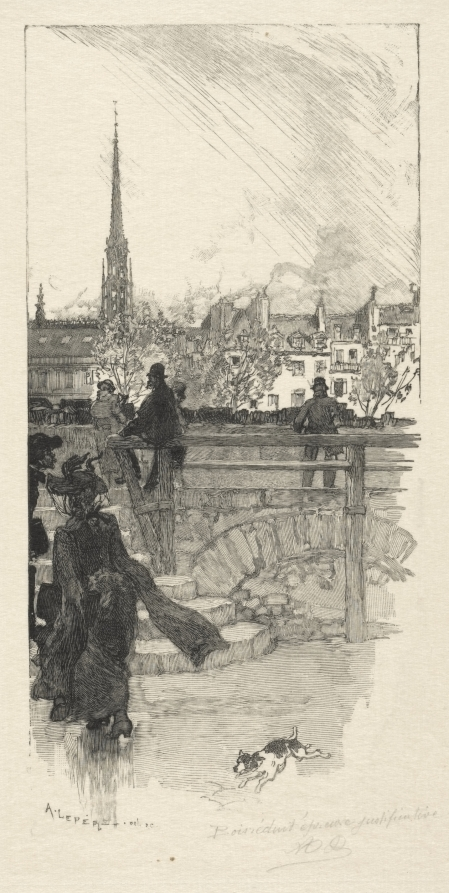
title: Quai des Grands Augustins, Paris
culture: France, 19th-20th century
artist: Auguste Louis Lepère (French, 1849–1918)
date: 1886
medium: wood engraving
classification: Print